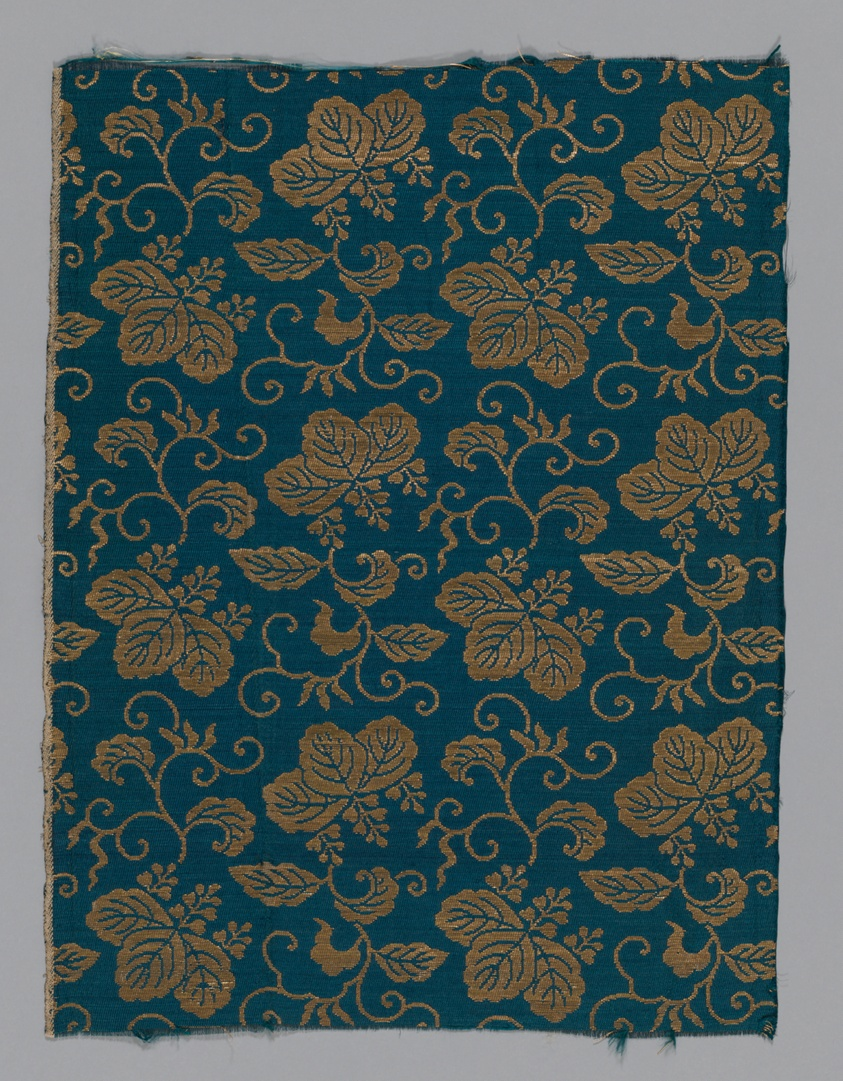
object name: Textile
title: Fragment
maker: Japan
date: late Edo period (1789–1868)/ Meiji period (1868–1912), 19th century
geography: Japan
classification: textile; weaving